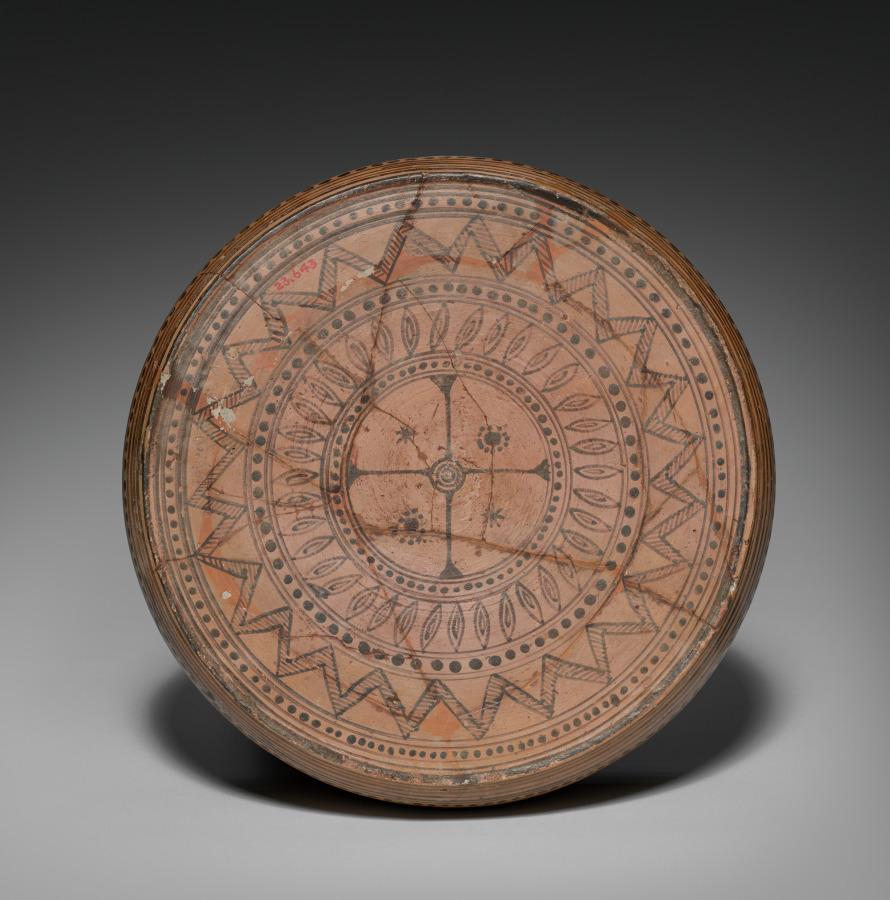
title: Geometric Horse Pyxis (Cylindrical Box)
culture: Greek, Attic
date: c. 760–750 BCE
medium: ceramic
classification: Ceramic